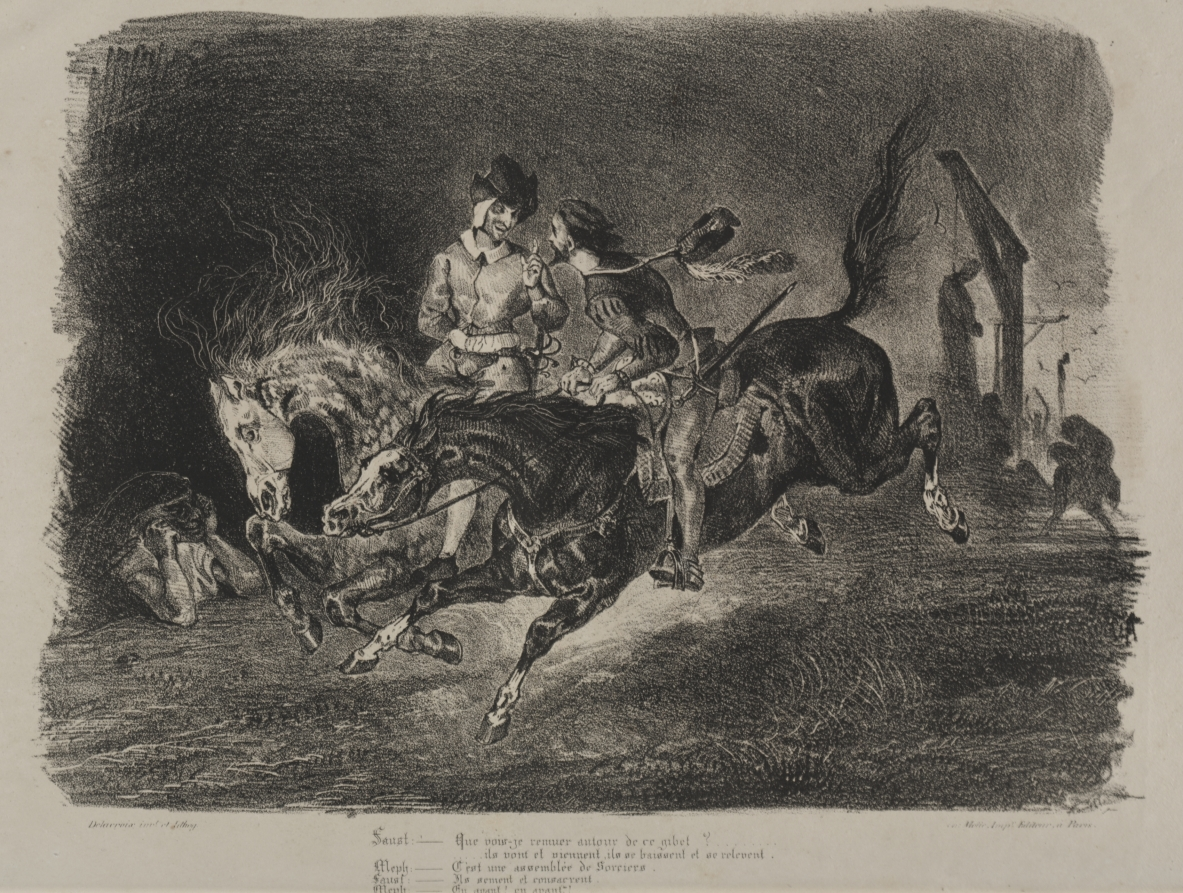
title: Illustrations for Faust: Faust and Méphistophélés horse riding on the Sabbath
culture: France, 19th century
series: Faust: Tragédie de M. de Goethe, translated into French by Albert Stapfer.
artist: Eugène Delacroix (French, 1798–1863)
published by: Chez Ch. Motte, Éditeur, distributed by Chez Sautelet, Libraire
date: 1828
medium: lithograph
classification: Print